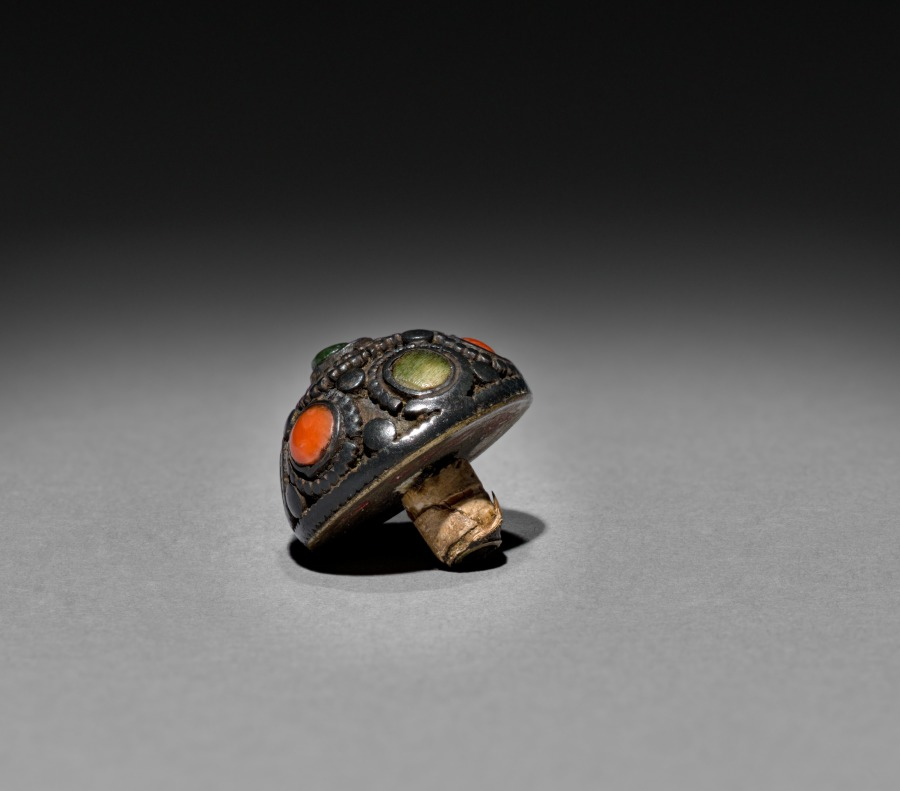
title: Snuff Bottle (stopper)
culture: China, Qing dynasty (1644-1911)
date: 1644–1911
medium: glass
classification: Glass